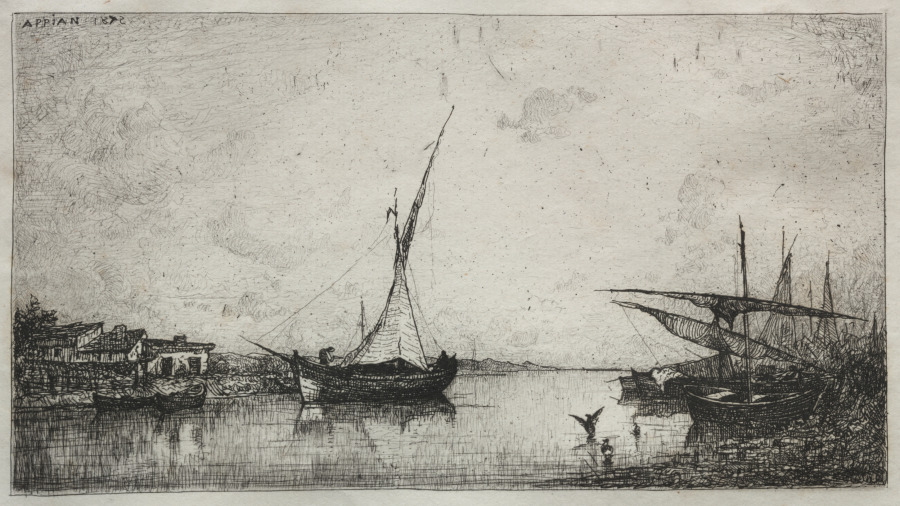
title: Canal at Martiques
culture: France, 19th century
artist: Adolphe Appian (French, 1818–1898)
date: 1872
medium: etching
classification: Print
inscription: upper left, in plate Appian 1872